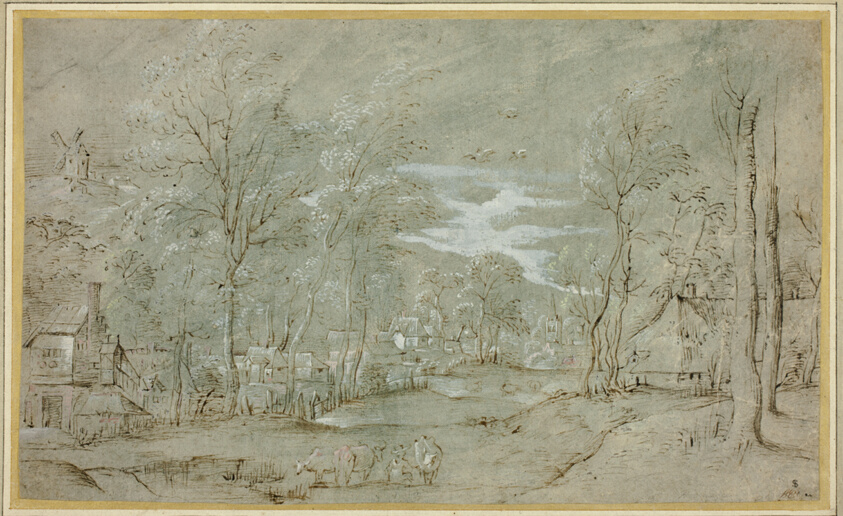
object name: Drawing and Watercolor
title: Village Among the Trees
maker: Unknown artist; Flemish, active in Antwerp, mid-16th century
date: c. 1560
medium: Pen and brown ink, heightened with opaque white watercolor and touches of pink and yellow watercolor, over black chalk, on blue tinted laid paper, laid down on laid paper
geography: Flanders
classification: pen and ink drawings; drawings (visual works); prints and drawing